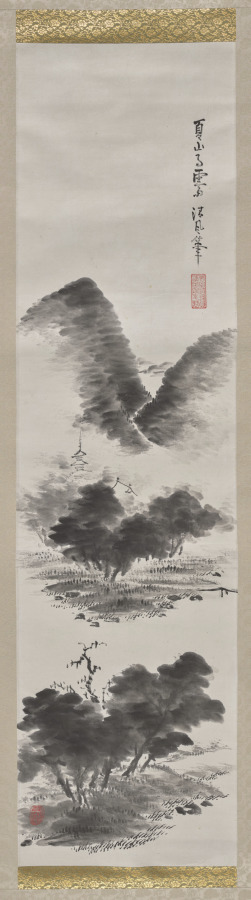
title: Rain Clearing over a Summer’s Mountain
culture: Japan, Meiji period (1868–1912)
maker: Seifū Yohei III (Japanese, 1851–1914)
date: 1893–1914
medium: hanging scroll; ink on paper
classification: Painting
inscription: The signed inscription by the artist in the painting’s upper right gives the title "Rain Clearing Over a Summer’s Mountain" and is accompanied by his Imperial Household Artist seal.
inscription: Artist's signature seal in the lower left on the grassy riverbank.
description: Before entering into his apprenticeship with Yohei II, Yohei III trained as a painter in Osaka. He continued to paint throughout his career as a ceramist. Yohei IV authenticated this painting as having been done by his father in a box lid inscription dated to the summer of 1919 . The signed inscription by Yohei III in the painting’s upper right gives the title Rain Clearing Over a Summer’s Mountain and is accompanied by his Imperial Household Artist seal. His signature seal is found in the lower left on the grassy riverbank. The composition follows a basic literati painting convention: it is divided into a foreground, middle ground, and background, with trees in the front, a temple in the middle, and mountains at the back. The brushwork, too, with its ovals of inkwash and dry-brushed dots and lines, has the casual feel of a painting made for one’s own amusement or dashed off for a friend. As part of his ceramic practice, Yohei III also made roller ends to be placed at either end of the wooden dowel around which the lower part of a hanging scroll mounting is wrapped. These served both as weights for the painting and as knobs for handling it when rolling and unrolling. The pair here, CMA 2022.152, is made of porcelain with a green glaze.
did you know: Seifū Yohei III studied to paint ink compositions in an abstracted, calligraphic way associated with well-read people who made paintings for their own amusement and as gifts for friends.